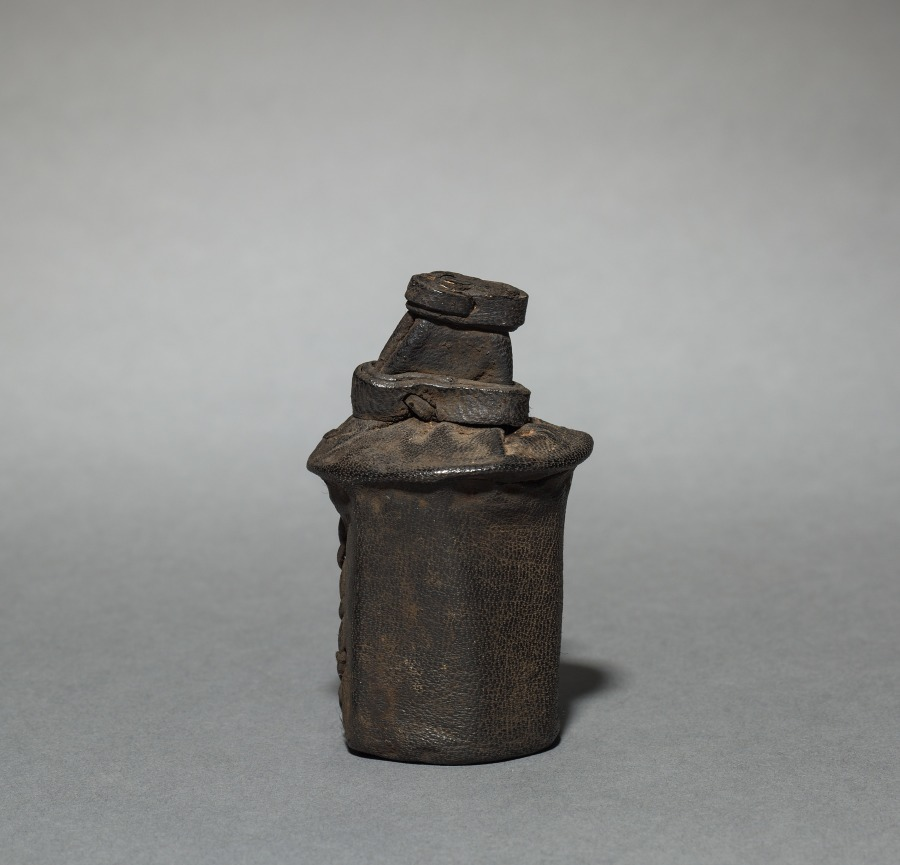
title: Stopper for Ten Nesting Wedding Baskets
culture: Africa, Western Sudan, Burkina Faso, Lobi, 20th century (?)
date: c 1900s ?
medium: Plant fiber and leather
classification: Vessels